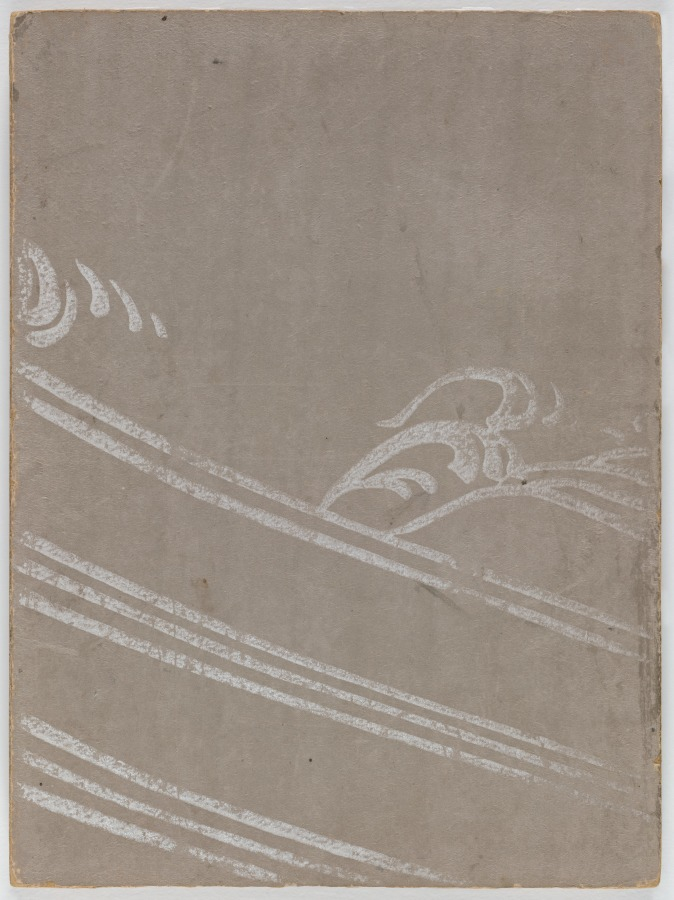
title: Flowers of a Hundred Worlds (Momoyogusa), Vol. 3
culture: Japan, Meiji period (1868–1912)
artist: Kamisaka Sekka (Japanese, 1866–1942)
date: 1909–10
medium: one of a set of three woodblock printed folding-books; ink, color, gold, and silver on paper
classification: Bound Volume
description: This volume from a set of three woodblock printed albums displays the graphic design prowess of Kamisaka Sekka. The images were first distributed one by one to subscribers to the series but later were reissued in bound form, like this book, for mass consumers. Each print features a vignette taken from nature or Japanese literature. Many of the scenes have a long history in Japan, originating in the 900s or 1000s and having been interpreted by all manner of artists since that time. Sekka’s selections hew closely to precedents from the Rinpa style originated by painter Tawaraya Sōtatsu (c. 1570–c. 1640) and calligrapher Hon’ami Kōetsu (1558–1637).